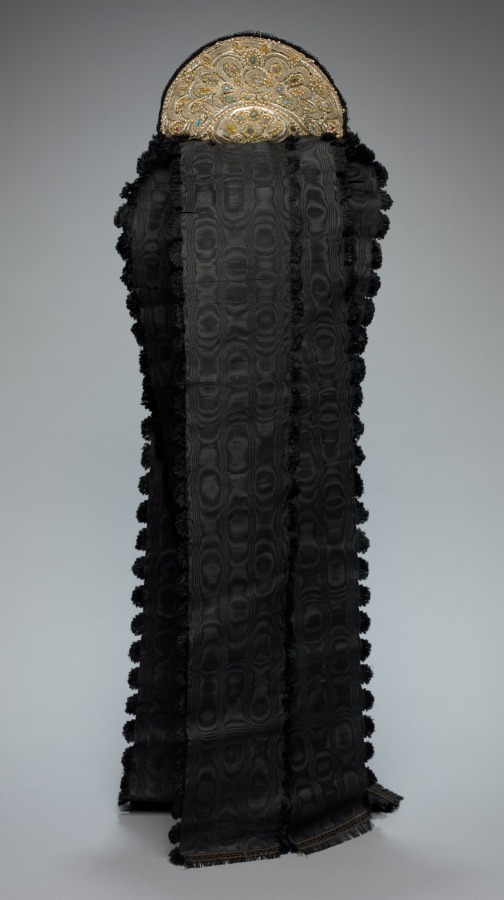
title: Headdress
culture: Germany, Swabia, 18th century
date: 1700s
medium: embroidery, decorated with silver thread, imitation pearls, colored stones, and streamers of moiré ribbon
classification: Garment